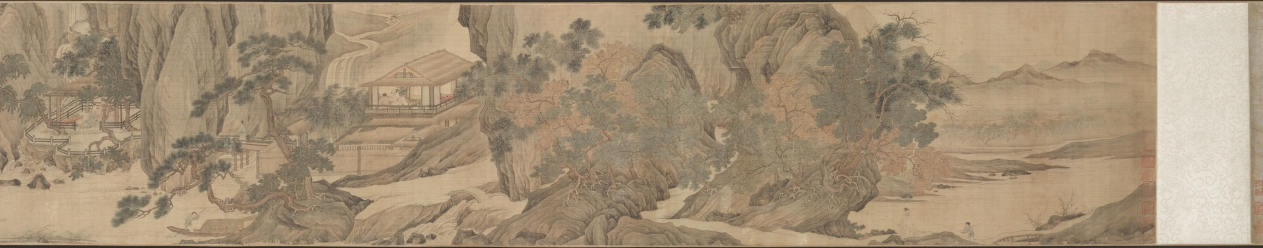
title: Scholar-Hermits in the Autumn Mountains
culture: China, Ming dynasty (1368–1644)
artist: Tang Yin (Chinese, 1470–1523)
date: 1500–1510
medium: handscroll, ink and light color on silk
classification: Painting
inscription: Artist's signature and 2 seals at end of scroll: Tang Yin [seals] T'ang Po-hu; T'ang Tzu'wei t'u-shu.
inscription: Title on frontispiece by Li Cho-kung (dates unknown).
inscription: 1 colophon and 11 additional seals: 1 colophon dated 1915 of Wu Tso-hsi (19th-20th c.); 2 seals of Gao Qifeng 高奇峰 (1889–1933); 5 seals of C. C. Wang 王季遷 (1907–2003); 4 seals unidentified.